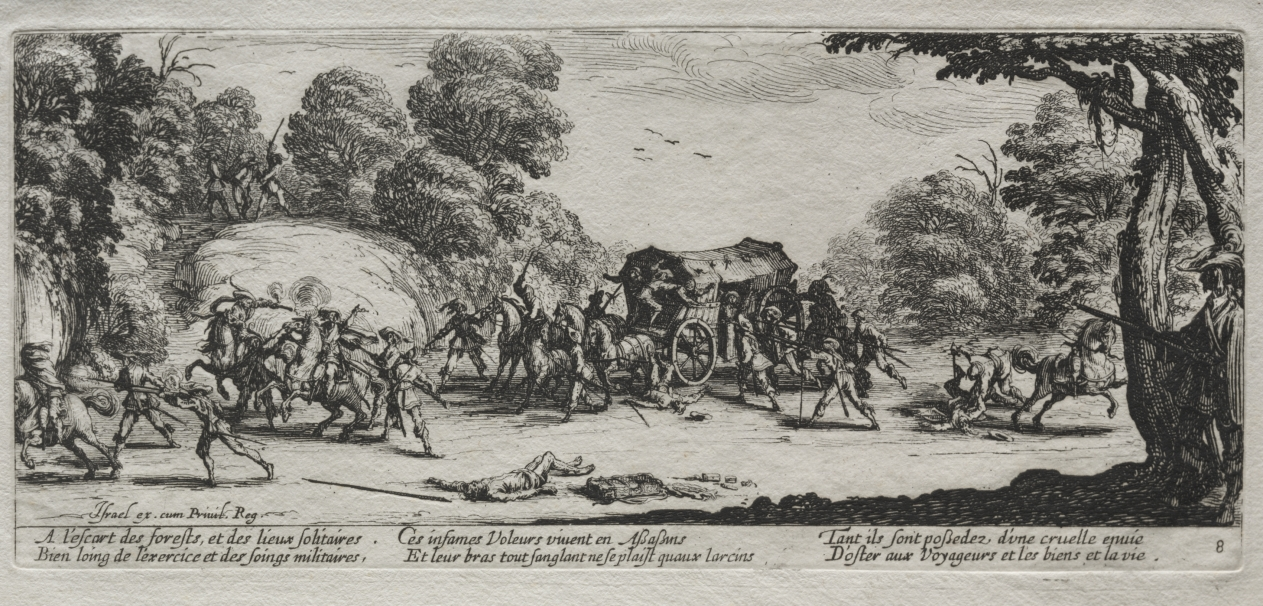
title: The Large Miseries of War: Highway Robbery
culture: France, 17th century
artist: Jacques Callot (French, 1592–1635)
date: 1633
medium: etching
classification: Print